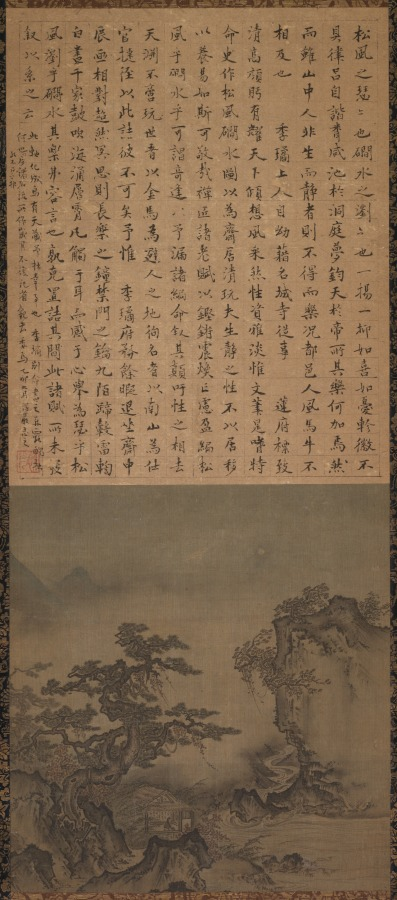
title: Landscape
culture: Japan, possibly Edo period (1615-1868)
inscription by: copy after Ishō Tokugan (Japanese, c. 1359–1437)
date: early 1600s to mid-1800s?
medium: hanging scroll; ink and slight color on paper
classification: Painting